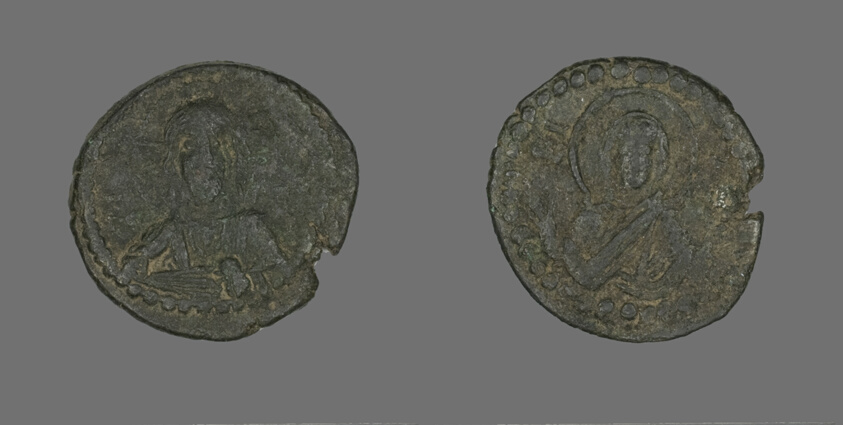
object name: Coin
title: Anonymous Follis (Coin), Attributed to Constantine IX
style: byzantine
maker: Byzantine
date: 1042-1055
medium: Bronze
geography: Greece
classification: coin; ancient art